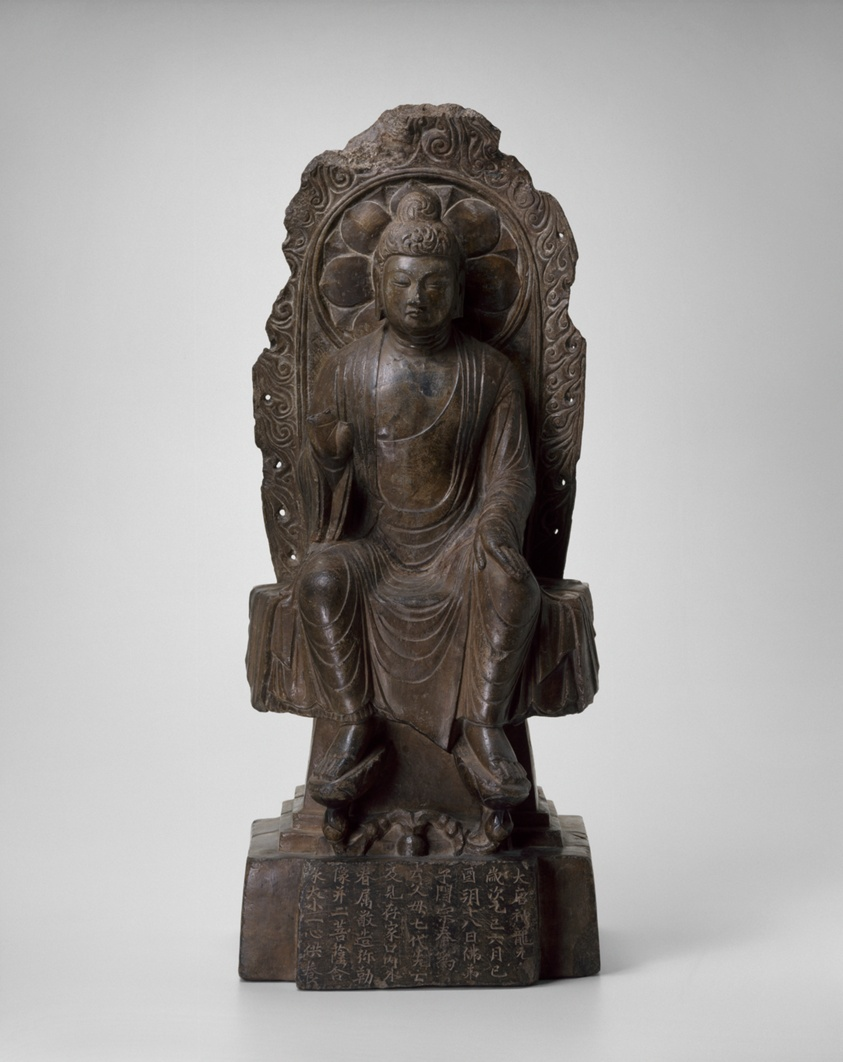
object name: Sculpture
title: Maitreya Buddha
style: Chinese (culture or style)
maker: China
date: Tang dynasty (A.D. 618–906), dated 705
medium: Limestone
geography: China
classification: stone; sculpture; asian art